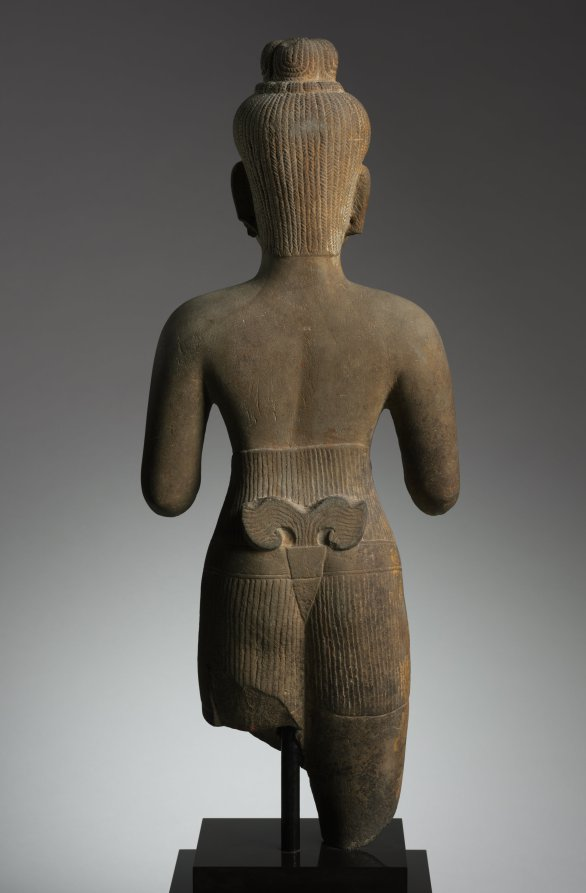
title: Shiva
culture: Cambodia, Angkor, Baphuon, early 12th century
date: early 1100s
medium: gray sandstone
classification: Sculpture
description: The parallel matted locks of hair and the incised third eye on the forehead identify this figure as the Hindu god Shiva. A close-cropped beard comes to a point at his chin. The slim elegant form and short lower garment fastened with a low-slung belt are features characteristic of this period.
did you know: Three beauty lines are lightly incised around the neck.